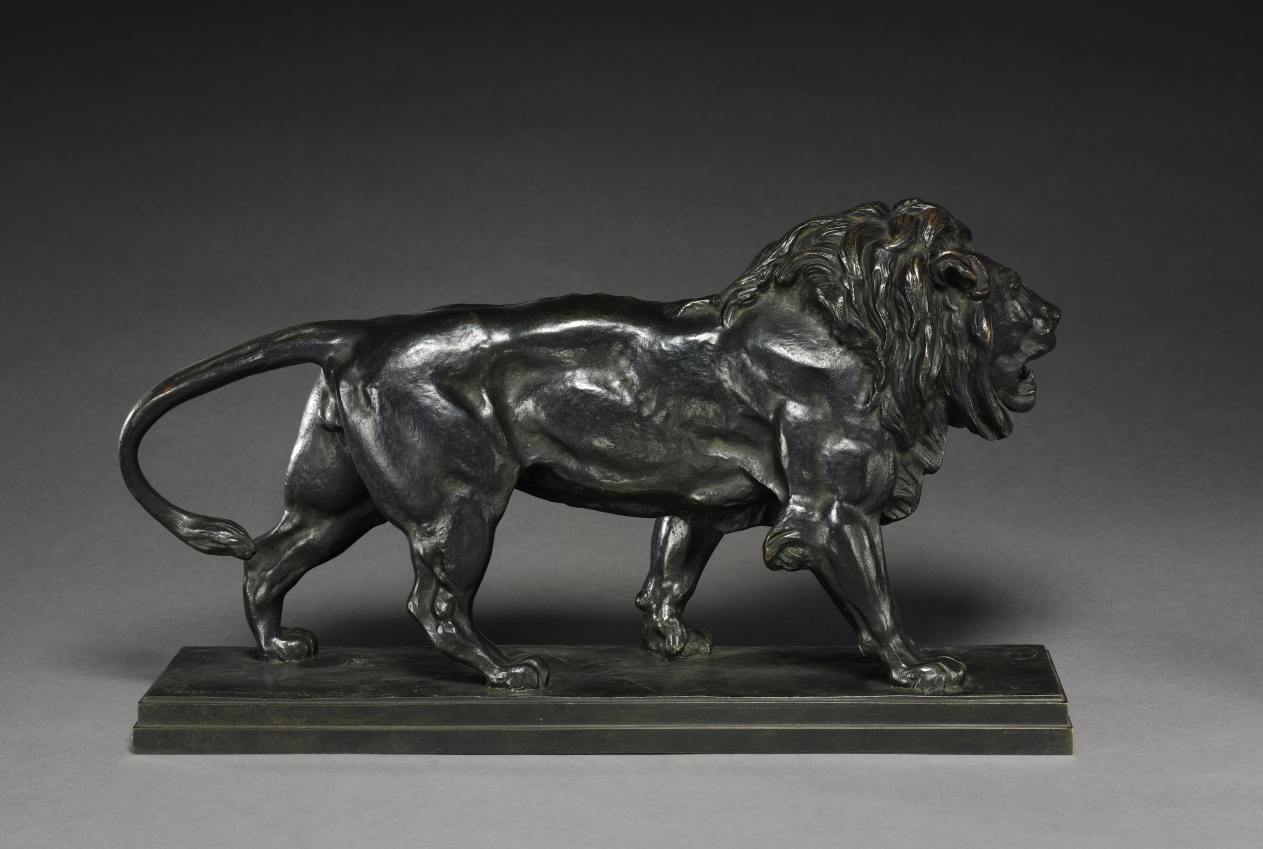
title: Walking Lion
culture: France, 19th century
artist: Antoine-Louis Barye (French, 1796–1875)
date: after 1836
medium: bronze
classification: Sculpture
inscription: Written on base: "Barye"